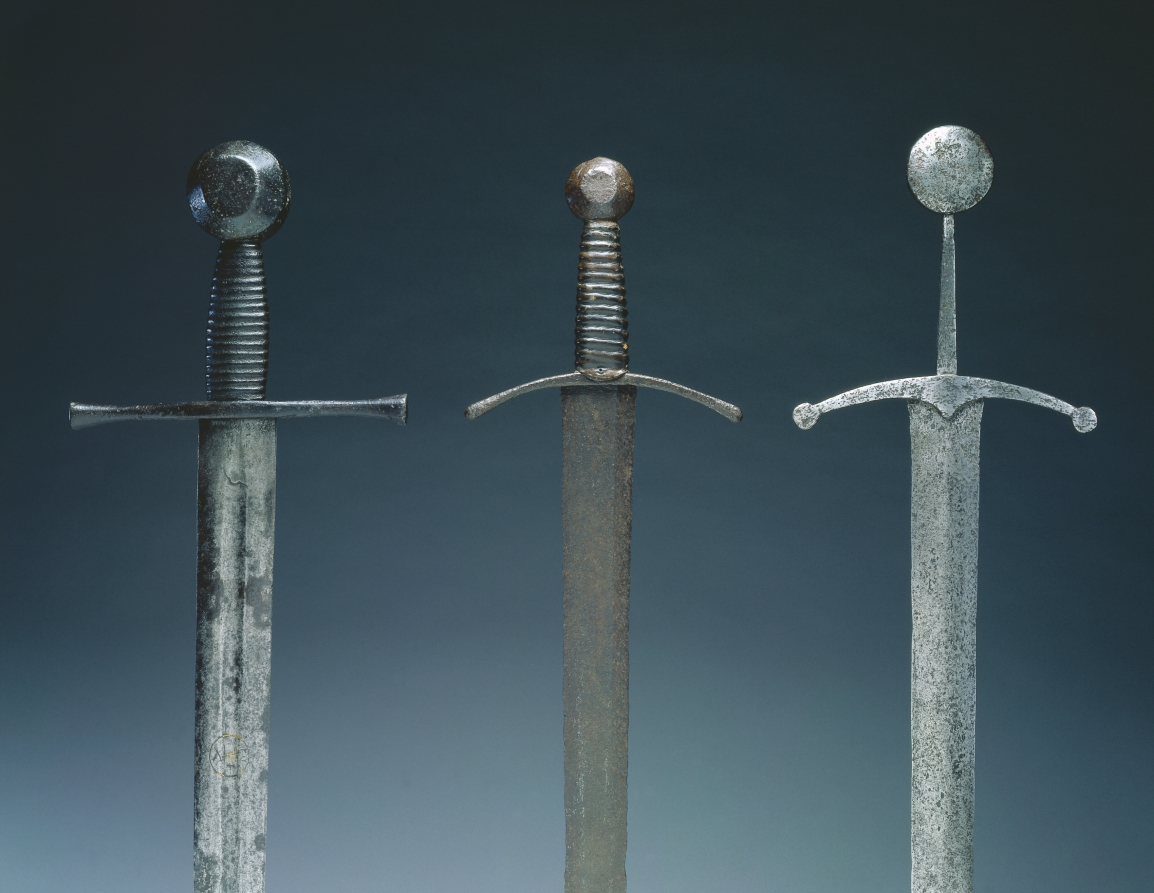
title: Sword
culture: European, early 15th century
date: c. 1400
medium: steel, leather, wire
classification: Arms and Armor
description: The principal weapon of the European knight was his sword, a simple weapon with a broad, two-edged blade, a straight crossguard, and a round pommel or counterweight. The pommel gave the knight full mastery of a perfectly balanced weapon. The basic shape of the sword did not change significantly between 1200 and 1500.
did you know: A sword required a different composition of steel than armor; as a result swordsmithing centers of Europe differ from those that specialized in armor.